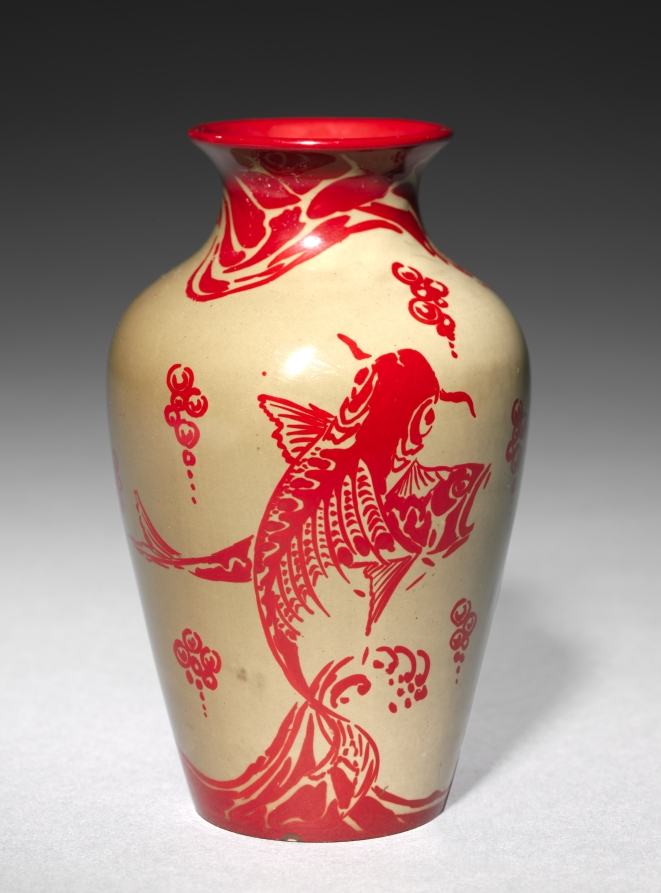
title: Vase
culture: England, 20th century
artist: Bernard Moore (British, 1850–1935)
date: c. 1900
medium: porcelain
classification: Ceramic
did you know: The designer Bernard Moore studied Asian and Islamic ceramics. He was especially interested in glazes like the vivid red one on this vase that resembles the color of oxblood.